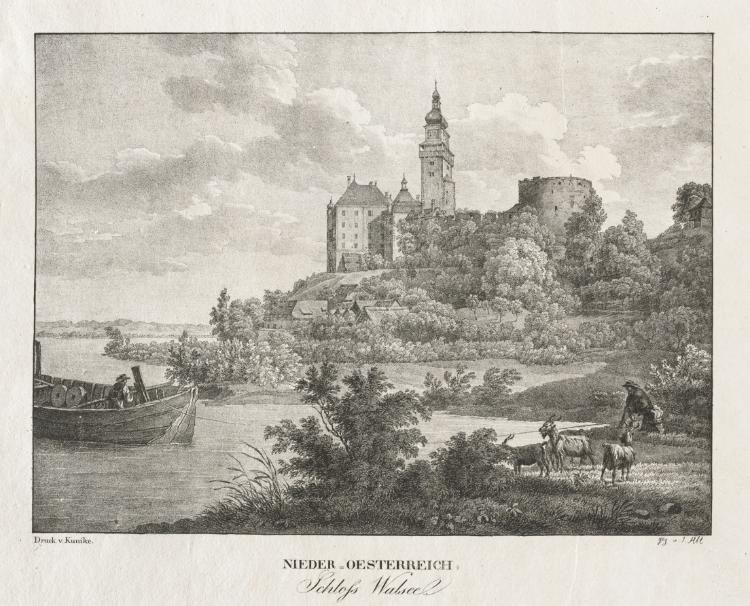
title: Nieder-oesterreich, Schloss Walseel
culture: Austria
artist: Jakob Alt (Austrian, 1789–1872)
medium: lithograph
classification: Print